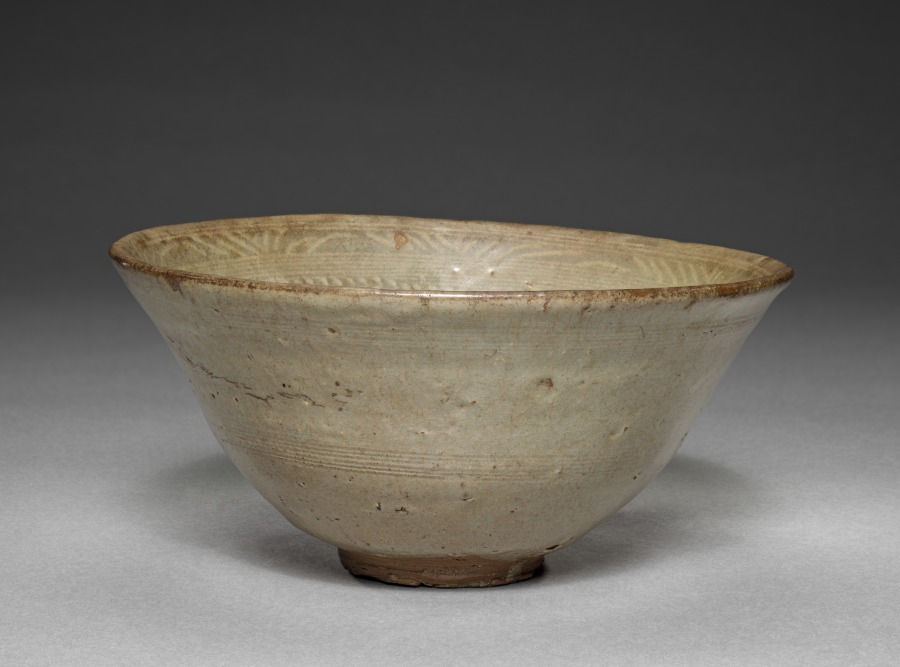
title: Bowl with Stamped Floral Decoration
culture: Korea, Joseon dynasty (1392–1910)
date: 1400s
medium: glazed ceramic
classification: Ceramic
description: This type of wide-mouthed bowl was used every day in Korea, not exclusively for tea drinking. But when it was introduced to Japan around the early 16th century, its imperfect appearance evoking the aesthetics of wabi-sabi caused it to be repurposed as a tea bowl. Korean tea bowls were circulated as an item of foreign luxury among Japanese military elites. Many Korean potters were abducted to japan during the Japanese invasions (1592–98) and some settled down in Japan, particularly in the Saga prefecture in Kyushu. A Japanese tea bowl such as 1983.158 in the CMA collection is one example possibly created by the descendants of dislocated Korean potters.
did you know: This type of humble tea bowl was highly praised among Japanese collectors for its imperfect beauty.